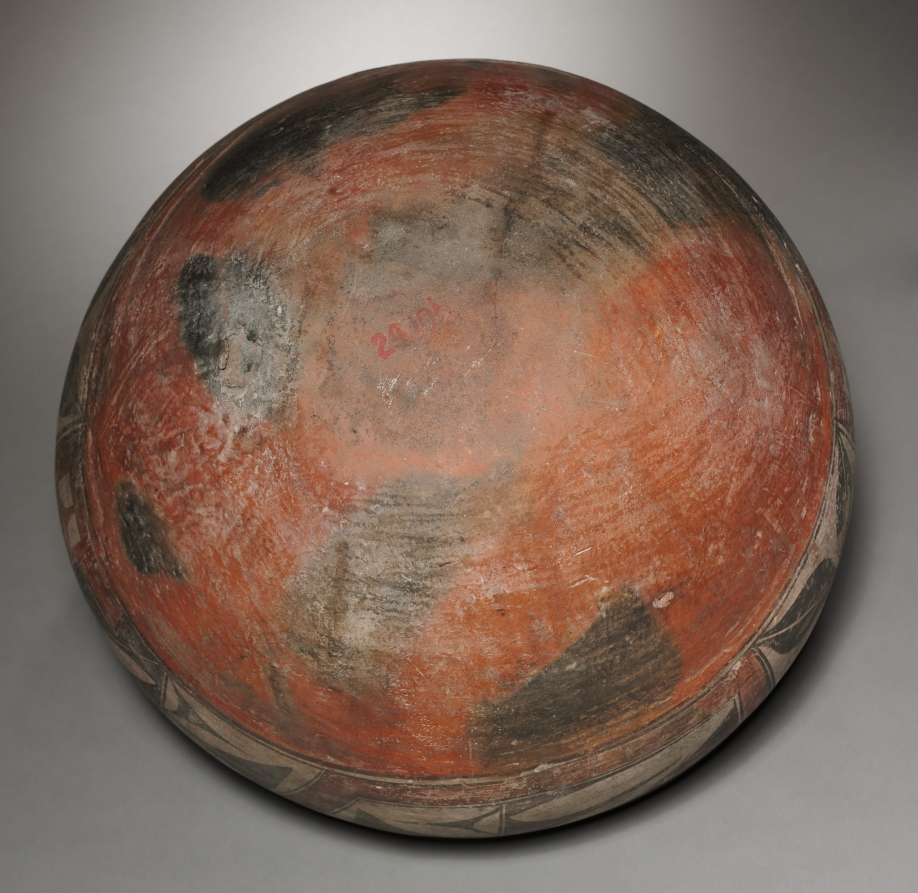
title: Dough Bowl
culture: Southwest,Pueblo, Zia, Post-Contact Period,19th century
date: 1890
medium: ceramic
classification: Ceramic